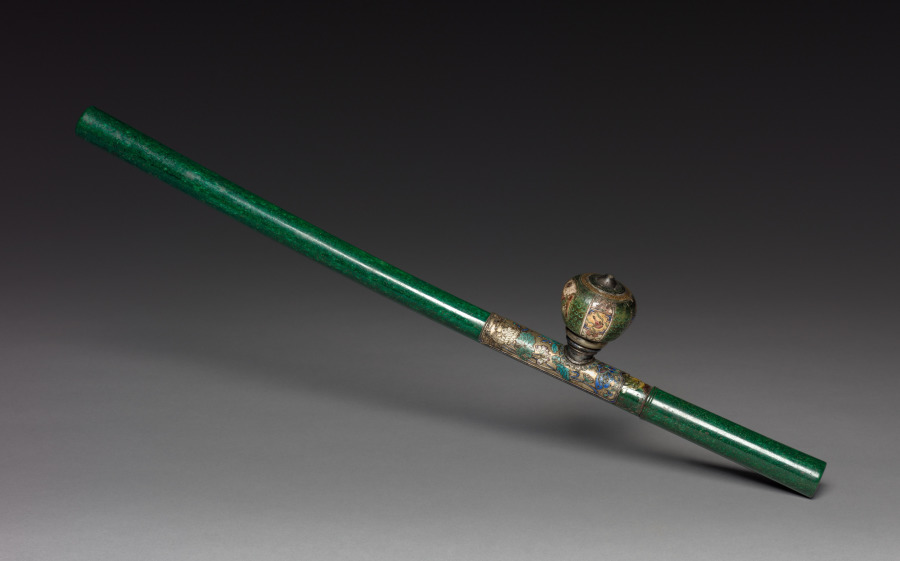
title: Opium Pipe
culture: China, Qing dynasty (1644-1911)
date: 1800s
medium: green stem decorated with enamel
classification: Miscellaneous